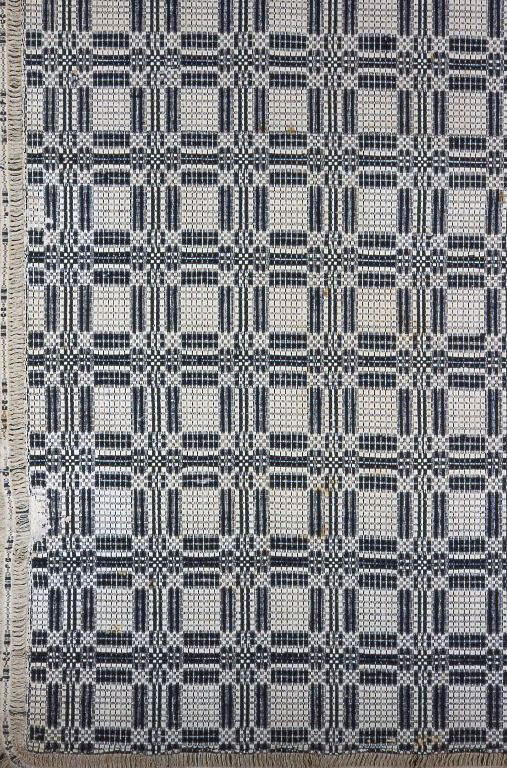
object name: Textile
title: Coverlet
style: 19th century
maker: Sarah Douglas Smith (American, active c. 1840); Stonington Colony, Christian County, Illinois, United States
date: 1840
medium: Cotton and wool, plain weave with supplementary patterning wefts (overshot); two loom widths joined; fringed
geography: Illinois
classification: weaving - coverlet; coverlet; textile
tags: geometric motif, geometric, squares, circles, coverlet